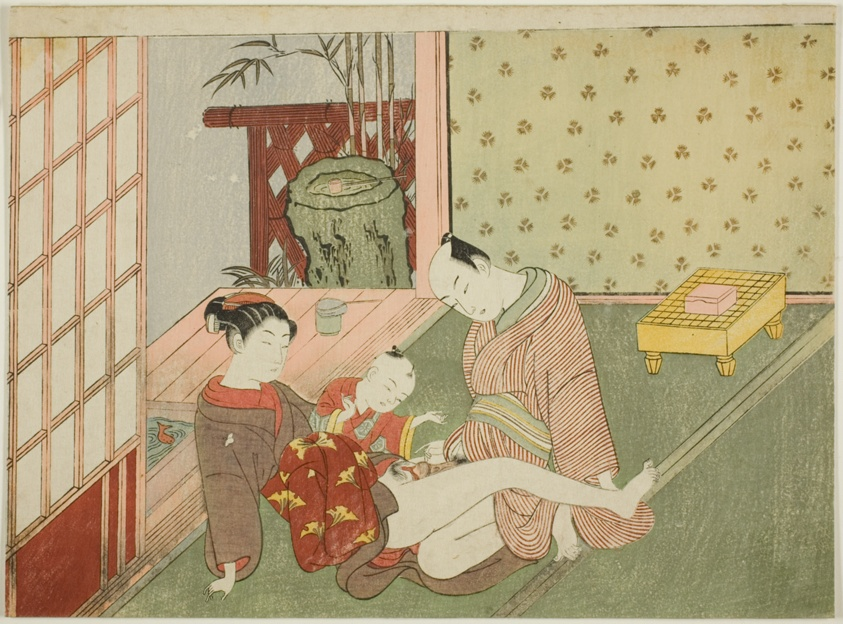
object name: Print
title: Lovers with Young Attendant Looking on, from an untitled series of erotic prints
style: Japanese (culture or style)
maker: Suzuki Harunobu 鈴木 春信; Japanese, 1725 (?)-1770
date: c. 1766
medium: Color woodblock print; chuban yoko-e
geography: Japan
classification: woodblock print; print; asian art